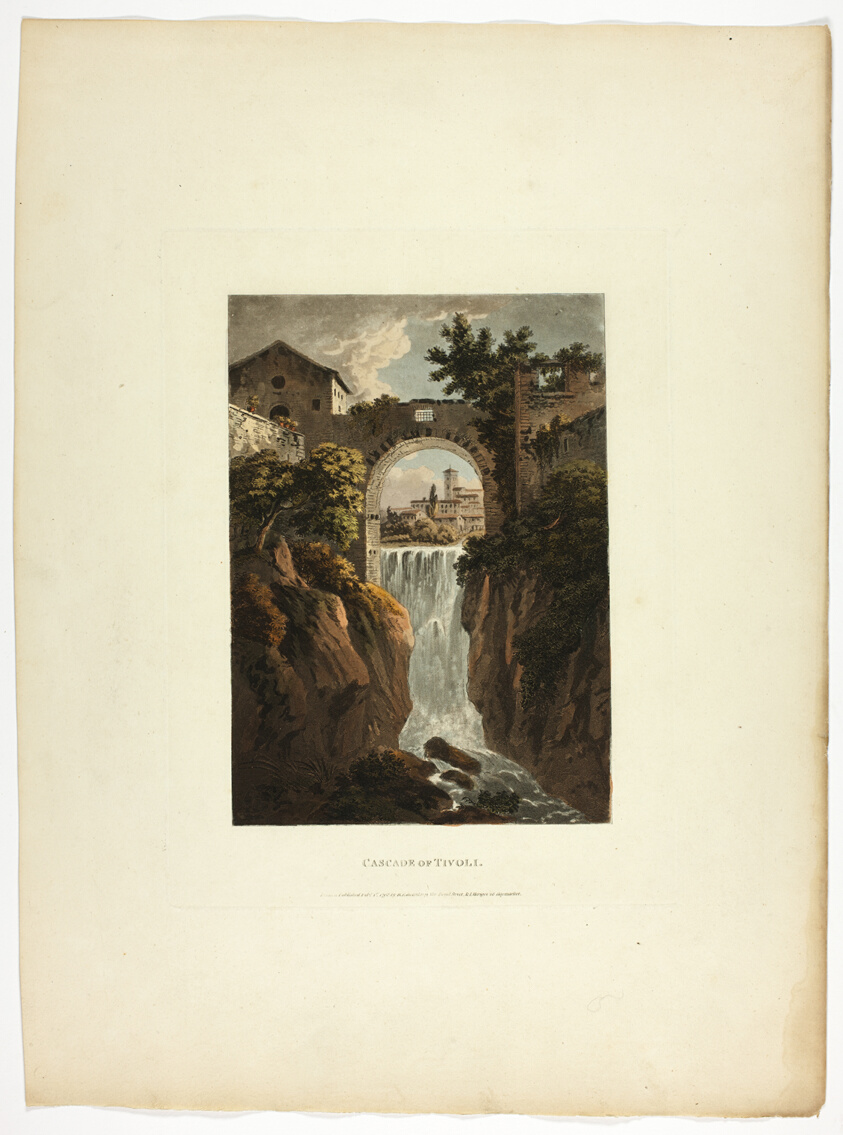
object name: Print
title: Cascade of Tivoli, plate thirty-nine from the Ruins of Rome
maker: M. Dubourg, (English, active 1786-1838); published by J. Merigot (Italian, Unknown)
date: published February 1, 1798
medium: Hand-colored aquatint on paper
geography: England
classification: aquatint; print; prints and drawing